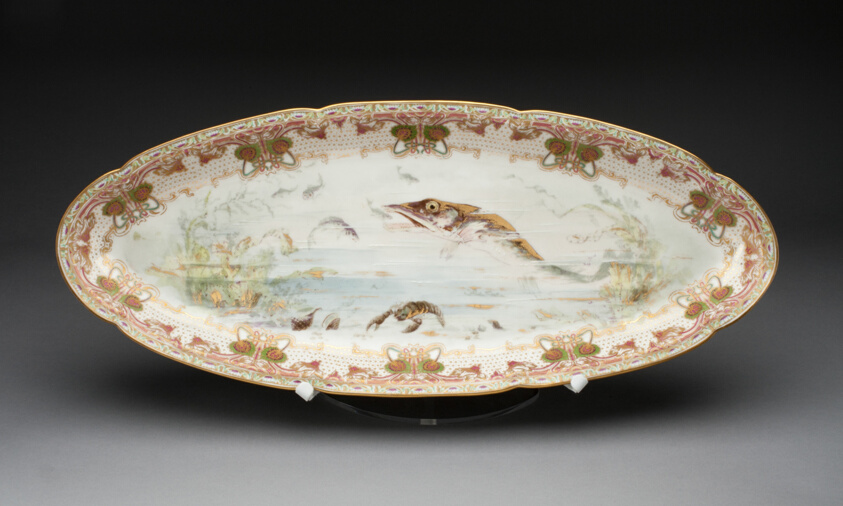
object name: Ceramics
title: Fish Platter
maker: Théodore Haviland (French, early 20th century)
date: c. 1900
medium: Porcelain with polychrome enamels and gilding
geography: France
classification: vessel for serving food; dish (vessel); porcelain; european decorative arts; ceramics